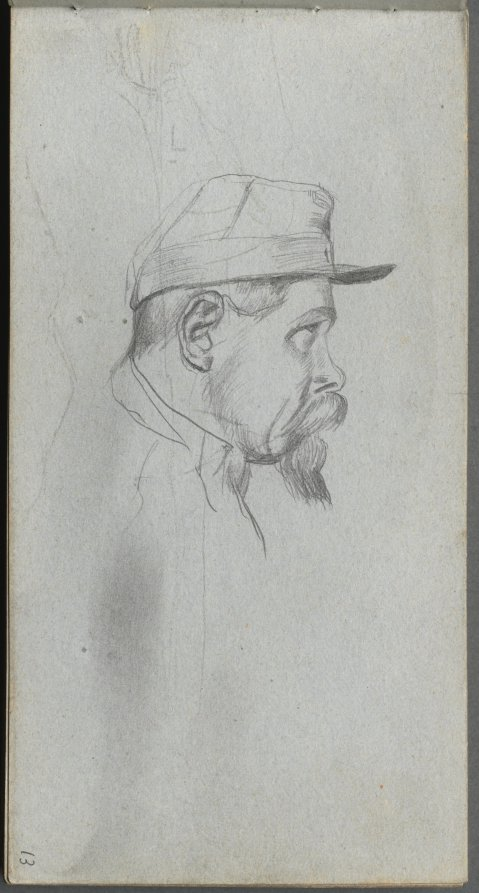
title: Sketchbook, page 13: Bust of a Man in Profile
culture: France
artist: Ernest Meissonier (French, 1815–1891)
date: c. 1860s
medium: graphite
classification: Bound Volume